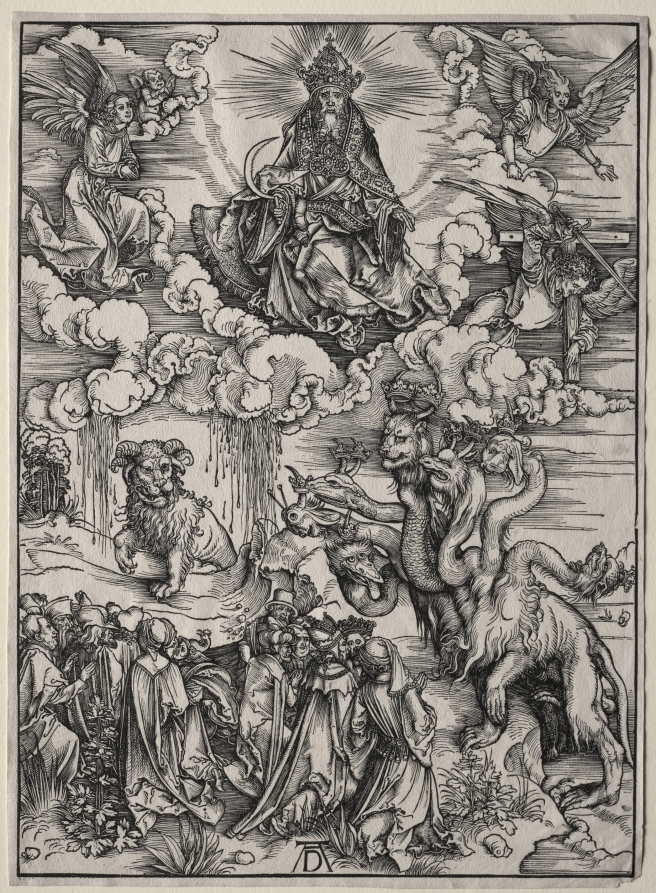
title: The Beast with Seven Heads and the Beast with Lamb's Horns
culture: Germany, late 15th-early 16th century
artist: Albrecht Dürer (German, 1471–1528)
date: c. 1496–98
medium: woodcut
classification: Print